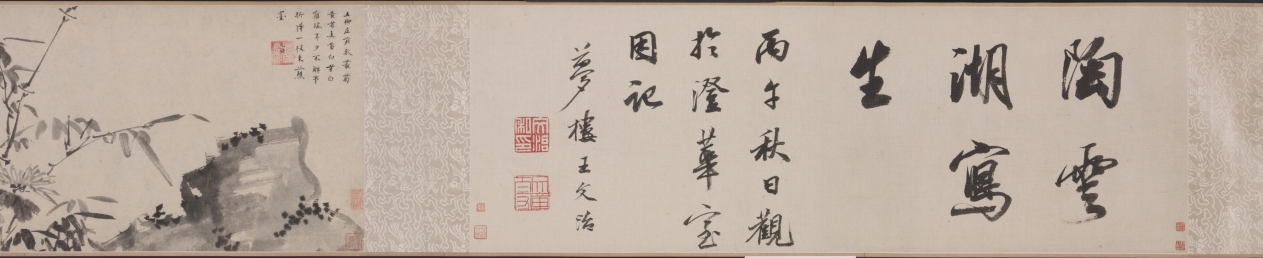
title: Chrysanthemums and Cabbage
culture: China, Ming dynasty (1368–1644)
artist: Tao Cheng (Chinese, active c. 1471–after 1502)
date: c. 1486 or before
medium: handscroll, ink and slight color on paper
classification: Painting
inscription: Artist's seal at beginning of painting: Yun hu 雲湖. Title by Wang Wenzhi 王文治 (1730–1802), date 1756. 2 seals of Wang Wenzhi 王文治 (1730-1802); 3 seals of Ku Yün (n. d.)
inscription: Section A (Chrysanthemums): 1 poem and 1 seal of Zhang Yuanzhen 張元禎 (1437–1507) - Jinshi, 1461; 1 poems and 3 seals of Ni Yue 倪岳 (1444–1501) - Jinshi, 1464; 1 poems and 2 seals of Zhao Xiang 趙祥 (life dates unknown) - Jinshi, 1469; 1 poems and 1 seals of Wu Xixian 吳希賢 (1437–1489) - Jinshi, 1464; 1 poems and 1 seals of Lü Chang 呂㦂 (1449–1511) - Juren, 1471; 1 poems and 3 seals of Fu Han 傅瀚 (1435–1502) - Jinshi, 1464; 1 poems and 1 seals of Feng Jue 馮珏 (life dates unknown) - Jinshi, 1478.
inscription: Chrysanthemums section, poem 1, by Zhang Yuanzhen 張元禎 (1437–1507): Several bushes of chrysanthemums grow in front of the Five-Willow Cottage,/ The yellow ones are really yellow and the white ones white./ This affable and decent fellow, young in years and unsophisticated,/ Has snapped one of the branches to dip in ink. (The Five-Willows Cottage was the home of the poet Tao Qian 陶潛 (Tao Yuanming 陶淵明, AD 365-427).) Chrysanthemums section, poem 2, by Ni Yue 倪岳 (1444–1501): Where at the Eastern Fence can you grieve for the Soul of the Xiang River?/ A man of upright character is mourned within the traces of ink./ White jade with a slight flaw would be a grievance forever,/ Later men should understand why even the roots of the flowers are washed. (Eastern Fence refers again to the poet Tao Qian 陶潛, while the Soul of the Hsiang River refers to the poet Qu Yuan 屈原 (c. 340–278 BC).) Chrysanthemums section, poem 3, by Zhao Xiang 趙祥 (life dates unknown): A clump of chrysanthemum grows in front of the bamboo pavilion,/ The winds of many autumns have blown since we parted beyond the river./ Straining wine through the official's cap of Tao [Qian] to prolong autumn's pleasures,/ The mists and clouds of ten thousand miles belong to the intoxicated. Chrysanthemums section, poem 4, by Wu Xixian 吳希賢 (1437–1489): It is a different spring if mulberry is planted during the latter part of the year,/ The dust of the world originally did not drop on clothing./ Who spills out ink under the Eastern Fence/ And paints so freely this portrait of chrysanthemums for the venerable Sir Tao? Chrysanthemums section, poem 5, by Lü Chang 呂㦂 (1449–1511): This full tray of ink for painting [flowers] at the Eastern Fence;/ Their whiteness or yellowness is not essential in capturing their beauty./ I don't have to go to Jiangnan to see them myself./ At my old house grow two or three branches. Chrysanthemums section, poem 6, by Fu Han 傅瀚 (1435–1502): Who daubed autumn flowers with ink/ As if they were dark dew on a branch tip only vaguely seen at evening?/ After the lazy clouds disperse, no one paints;/ A certain unconventionality pervades this painting. Chrysanthemums section, poem 7, by Feng Jue 馮珏 (life dates unknown): To satisfy his hunger, [the chrysanthemums] have at times entered the poetry of Qu Yuan;/ Taking up the wine cup, it felt close to Tao Qian./ [With them I am like] a lonely root sustained by deep water/ Or an old man to whose hair the color of youth returns.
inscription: Section B (Cabbage): 1 poem and 1 seal of Cai Qi 蔡圻 (life dates unknown) - degree information not known; 1 poems and 3 seals of Ni Yue 倪岳 (1444–1501) - Jinshi, 1464; 1 poem and 3 seals of Jiao Fang 焦芳 (1436–1517) - Jinshi, 1464; 1 poem and 3 seals of Li Dongyang 李東陽 (1447–1516) - Jinshi, 1464; 1 poems and 1 seals of Wu Xixian, signed “Xixian” 吳希賢 - Jinshi, 1464; 1 poems and 3 seals of Fu Han 傅瀚 (1435–1502) - Jinshi, 1464; 1 poems and 1 seals of Lü Chang 呂㦂 (1449–1511) - Juren, 1471; 1 poems and 2 seals of Zhao Xiang 趙祥 (life dates unknown) - Jinshi, 1469; 1 poems and 1 seals of Feng Jue 馮珏 (life dates unknown) - Jinshi, 1478.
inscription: Cabbage section, poem 1, by Cai Qi 蔡圻 (life dates unknown): The ink splashes are fresh from a frosty brush dipped in pond water;/ I can visualize that time when Yunhu 雲湖 [Tao Cheng] first showed his talents./ I lament the places where I scribbled before,/ Who would open them to inscribe a poem? (The first line is an allusion to the famous Jin dynasty calligrapher Wang Xizhi 王羲之 (AD 303-361), who practiced calligraphy so diligently at the edge of a pond that the water turned black with ink.) Cabbage section, poem 2, by Ni Yue 倪岳 (1444–1501): After rain the vegetables begin to grow;/ How are the colors of the masses lately!/ Once you get used to them, the tastiest parts are the ends of the roots;/ I don't know if they can be used for "seasoning soup." ("Seasoning soup" is an allusion to the statesmanship of a chief minister.) Cabbage section, poem 3, by Jiao Fang 焦芳 (1436–1517): This crop of purple stalks and green leaves is late and irregular;/ Now the rainy season is over for the Eastern Garden./ All the nobles nowadays dine on meat;/ Who of them knows the flavor of this [cabbage]. Cabbage section, poem 4, by Li Dongyang 李東陽 (1447–1516): It's always helped the honest man to sober up after drinks./ I intend to go to the deepest part of the stream-crossed garden/ To refresh myself in the fragrance and dew of evening. Cabbage section, poem 5, by Wu Xixian 吳希賢 (1437–1489): After rain, the white silk is filled with fragrant vegetables;/ How many times this happens in Mr. Tao's paintings./ On whom will you depend to present a memorial to the ruler?/ Don't let this color emerge on the faces of the people. (The last line is meant as a warning to officials: the color of the vegetables (green) may be pleasing in itself, but when it emerges on the faces of the starving poor, it signifies a badly governed world.) Cabbage section, poem 6, by Fu Han 傅瀚 (1435–1502): For twenty years I have feasted on the excellent mutton of an official;/ Yet I talk and dream about the garden and its vegetables./ Do not merely say it is good to chew the root of the cabbage--/ You must taste to understand what poverty is. Cabbage section, poem 7, by Lu Chang 呂㦂 (1449–1511): The capital is never a place for an apprentice in the "garden of scholarship."/ Who would write about gardens and vegetables on an examination paper?/ I've walked throughout the country in spring;/ Make sure the people don't show this color. Cabbage section, poem 8, by Zhao Xiang 趙祥 (life dates unknown): After a wash of rain, the spring garden is still in order;/ The flavor [of the cabbage] is more suitable with a small drink and the hum of a tune./ The rich and powerful in their mansions consume dish after dish of meat;/ Vegetarian food is known only by the scholars. Cabbage section, poem 9, by Feng Jue 馮珏 (life dates unknown): A new cabbage is nourished with dew;/ It takes a long time to grow and mature./ The business of "seasoning the soup" is your responsibility;/ Better command the gardener to take care [of the cabbages]. trans. HK/LYSL/WKH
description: On an autumn day in Beijing, Tao Cheng had a gathering with a group of scholar-officials and created two paintings in a spontaneous, casual style. The first depicts chrysanthemums, slender bamboo stalks, and a rock in monochrome ink. Tao applied light colors for the second painting that depicts cabbage. Tao deliberately placed the images on the first sections of the paper so that his honorable guests could add their poetic inscriptions inspired by his imagery. In the first section to the right, all seven poetic inscriptions refer to the beloved poet and recluse Tao Qian (also called Tao Yuanming, AD 365–427) who was particularly known for his profound love for chrysanthemum flowers. Most of the inscriptions in the second section express sympathy for the poor, since cabbage is the main ingredient in their humble food. Taken together, the poems and paintings allude to the life and responsibilities of the scholar-official: the importance of both an upright character and a concern for the poor citizens in order to achieve good government.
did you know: Eminent calligrapher Wang Wenzhi 王文治 was only 27 sui when he wrote the title in 1756.